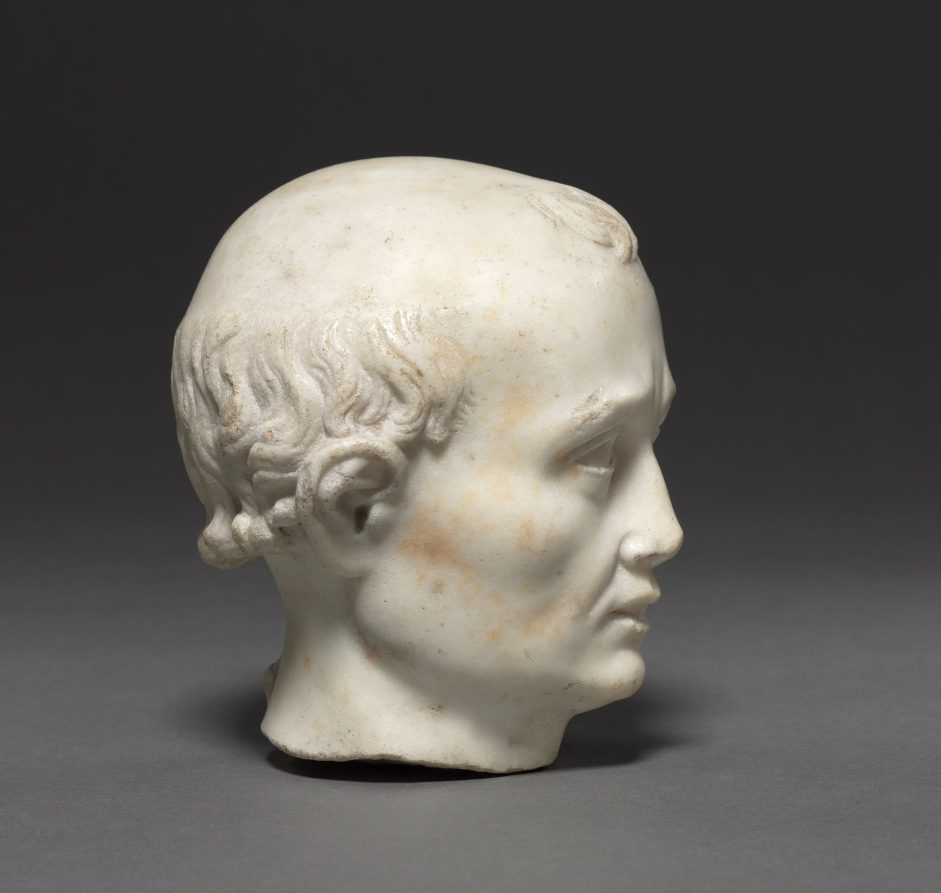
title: Head of a Man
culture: France, 15th century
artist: circle of Michel Colombe (French, c. 1430–c. 1513)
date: 1520–1525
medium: marble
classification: Sculpture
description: The original context and function of these two marble heads are unknown. They are presumed to have been part of a relief sculpture from a château, perhaps in the Loire region, or else from a tomb sculpture. Their style is reminiscent of sculptures produced by Michel Colombe, a prominent sculptor active in the Loire Valley in the service of aristocratic and royal patrons, and may have been carved by a close follower or member of his workshop.